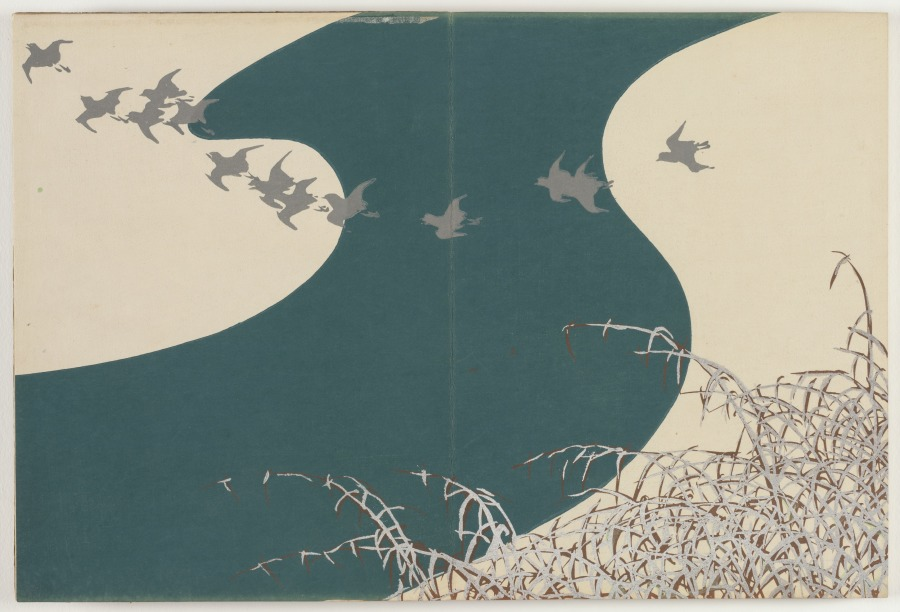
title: Flowers of a Hundred Worlds (Momoyogusa): River in Winter (Fuyu no kawa)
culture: Japan, Meiji period (1868–1912)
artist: Kamisaka Sekka (Japanese, 1866–1942)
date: 1909–10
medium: color woodcuts with gold and silver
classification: Bound Volume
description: This print from a set of three woodblock printed albums displays the graphic design prowess of Kamisaka Sekka. The images were first distributed one by one to subscribers to the series but later were reissued in bound form, like this book, for mass consumers. Each print features a vignette taken from nature or Japanese literature. Many of the scenes have a long history in Japan, originating in the 900s or 1000s and having been interpreted by all manner of artists since that time. Sekka’s selections hew closely to precedents from the Rinpa style originated by painter Tawaraya Sōtatsu (c. 1570–c. 1640) and calligrapher Hon’ami Kōetsu (1558–1637).